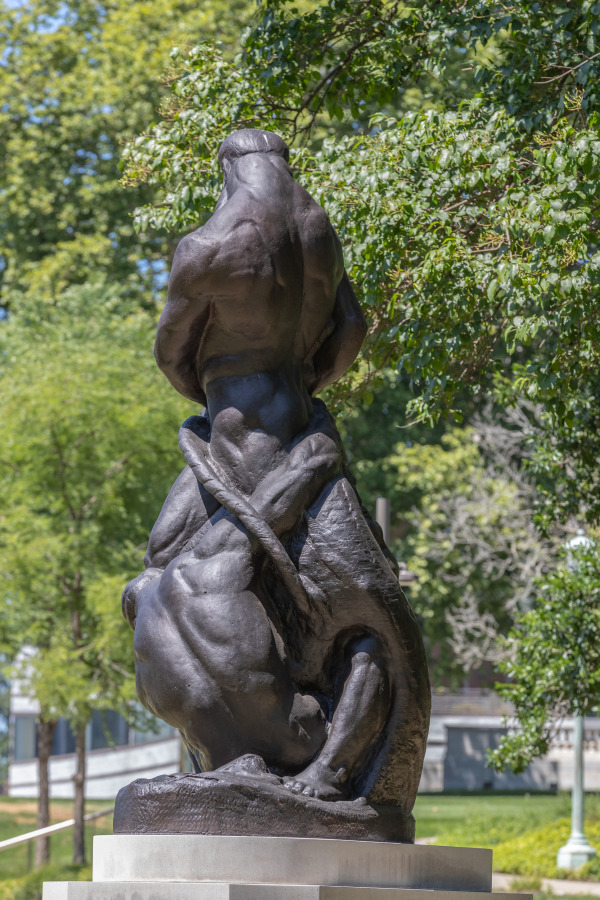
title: The City Fettering Nature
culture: America, Ohio, Cleveland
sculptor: Alexander Blazys (American, born Russian Empire [now Lithuania], 1894–1963)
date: 1927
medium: bronze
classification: Sculpture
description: Alexander Blazys, a Lithuanian immigrant, became a leading sculptor in Cleveland during the 1920s, when he created The City Fettering Nature for the Cleveland Museum of Art’s grounds. In this composition, Utility and Beauty, two characteristics of the city, are shown as intertwined figures attempting to subdue Nature’s power. The brawny figure of Nature, still standing despite this attack, struggles to free himself from the restraints.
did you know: This monumental bronze sculpture weighs 1,500 pounds and requires a crane to install.